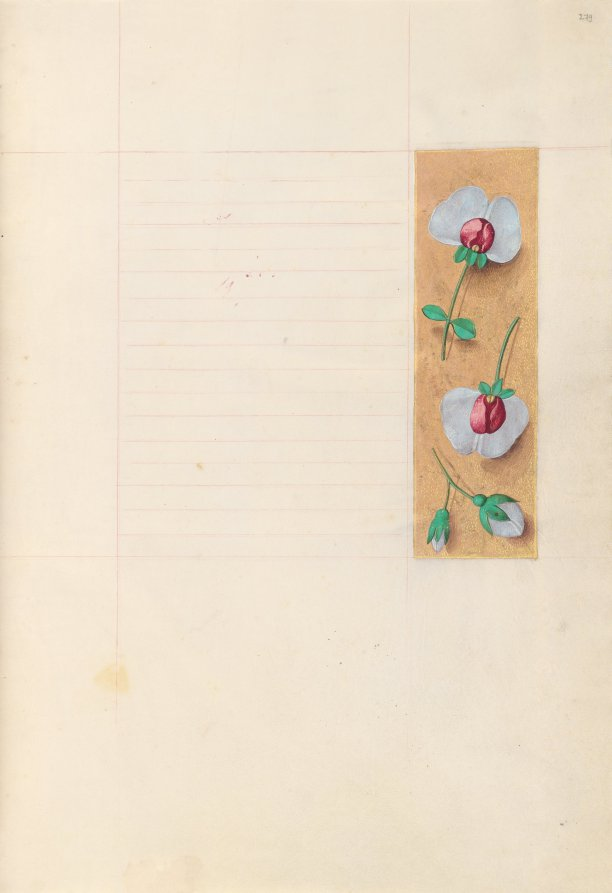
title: Hours of Queen Isabella the Catholic, Queen of Spain: Fol. 279r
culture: Flanders, Ghent and Bruges, late 15th century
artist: Master of the First Prayerbook of Maximillian (Flemish, c. 1444–1519)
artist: and Associates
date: c. 1500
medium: ink, tempera, and gold on vellum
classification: Bound Volume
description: This manuscript was illuminated by a circle of at least five highly organized manuscript painters active in the Flemish cities of Ghent and Bruges. The principal illuminator was Alexander Bening, who painted the majority of the book's miniatures. Manuscripts produced by this circle of artists are renowned for the decoration of their borders, which typically feature a rich variety of realistically-painted flowers, birds, and butterflies. This prayer book, called a book of hours, was intended not for a cleric, but for the private devotions of a lay person-in this case, Isabella the Catholic, Queen of Spain (1451-1504). Isabella's coat of arms embellishes the book's frontispiece. It is unlikely that the book was commissioned by the Queen herself; rather, she probably received it as a diplomatic gift from someone courting her patronage, perhaps Cardinal Francisco Jimenez de Cisneros. A Franciscan friar, Jimenez was dependent upon Isabella for his advancement, first to the post of Queen's confessor in 1492, and then to Archbishop of Toledo in 1495.